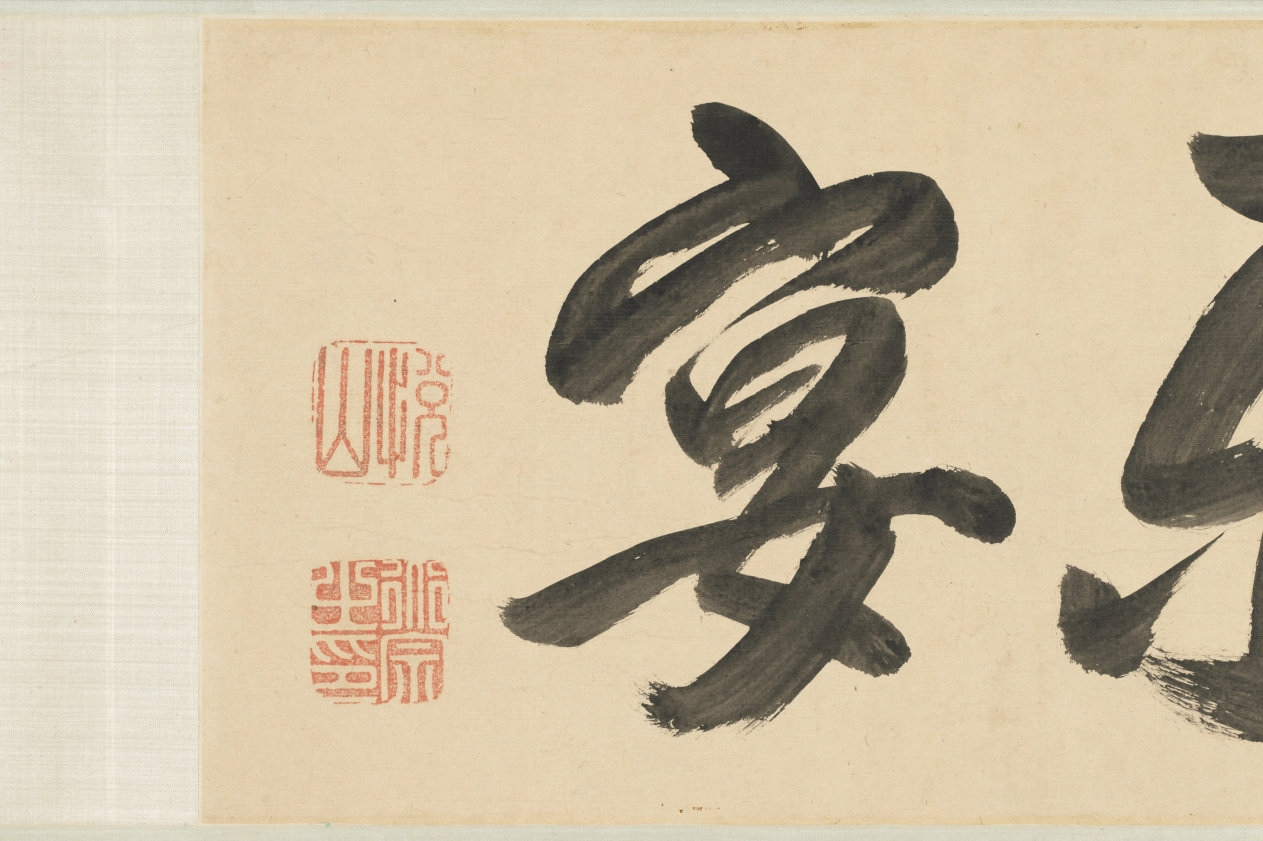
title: Purification at the Orchid Pavilion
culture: China, Qing dynasty (1644-1911)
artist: Fan Yi (Chinese, c. 1615–before 1688)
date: 1671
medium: Handscroll; ink and color on silk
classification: Painting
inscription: Artist's inscription, signature, and 2 seals: Painted by Fan Yi of Zhongfu during the second month of winter of the xinhai year [1671]. [2 seals] Fan Yi zhi yin, Zi yu yi.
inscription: Title on the frontispiece by Monk Yueshan (1629-1709).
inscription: 3 colophons and 13 additional seals: 1 colophon, dated 1707, and 6 seals of Yueshan; 2 colophons and 3 seals of Wong Kwan-Shut (Huang Junshi) 黃君實 (b. 1934); 2 seals of Fu Shen 傅 申 (b. 1937); 2 seals of Tessai Tomioka 富岡鐵齋 (1836-1924).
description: By the 1600s, the historic gathering at Lanting, Zhejiang province, in 353 CE was a common theme in Chinese painting. Originally based on a composition attributed to Li Gonglin (1049– 1106), now lost, Wu school artists revived the theme. Fan Yi, the brother of the artist Fan Qi from Nanjing, used delicate brushwork and luminous colors to depict the spring gathering.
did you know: The gathering’s host is in the Orchid Pavilion at the end of the scroll, representing an episode known as “Wang Xizhi Watching the Geese 王羲之觀鵝圖.”